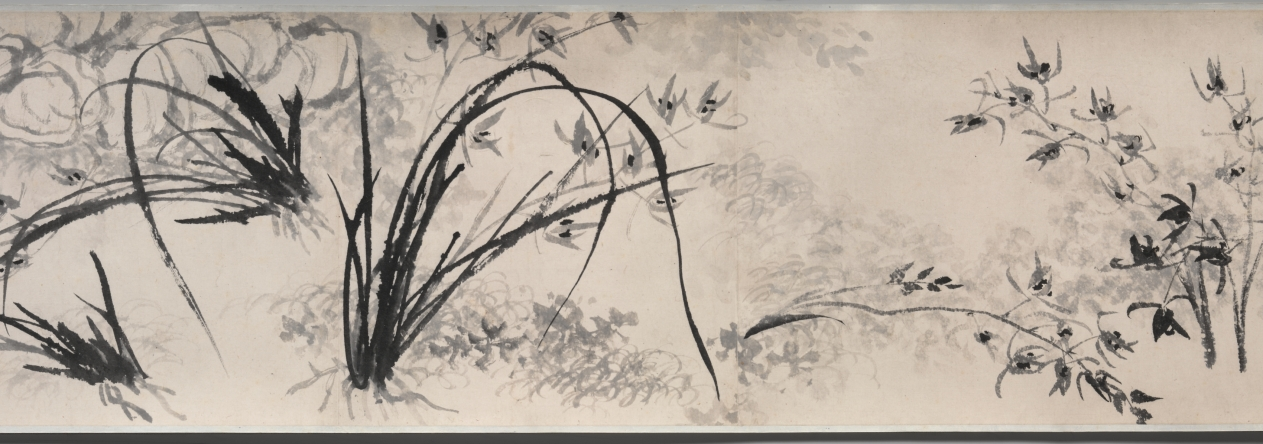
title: Rocks, Orchid, and Bamboo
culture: China, Qing dynasty (1644-1911)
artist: Shitao (Chinese, 1642–1707)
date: 1662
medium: handscroll; ink on paper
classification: Painting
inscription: Title colophon in four characters with signature and two seals on gold-flecked paper.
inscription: Artist's signature, inscription (with date of 1662), five seals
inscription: Colophon with two seals.